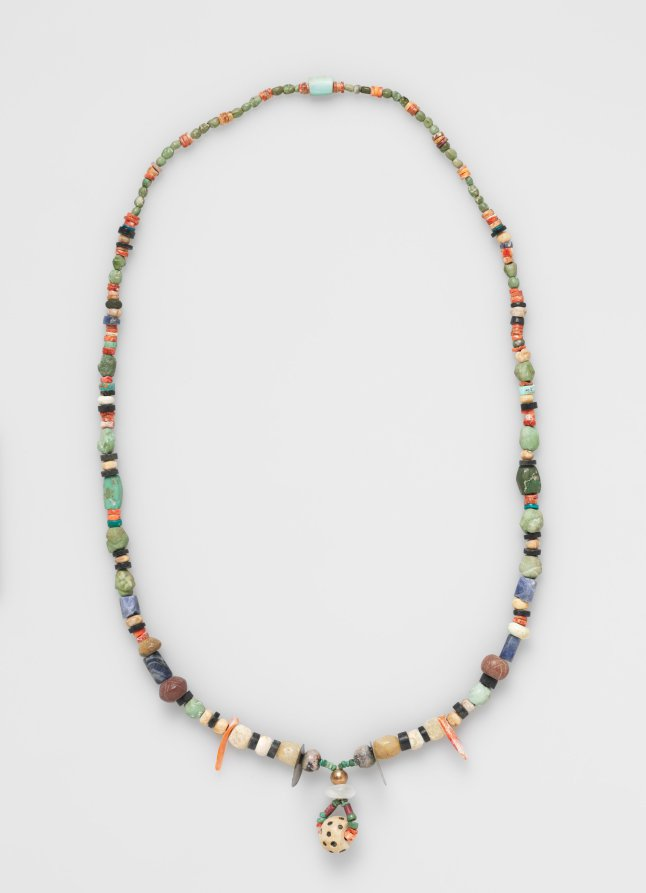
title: Necklace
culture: Peru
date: before 1532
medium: polished stone beads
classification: Jewelry